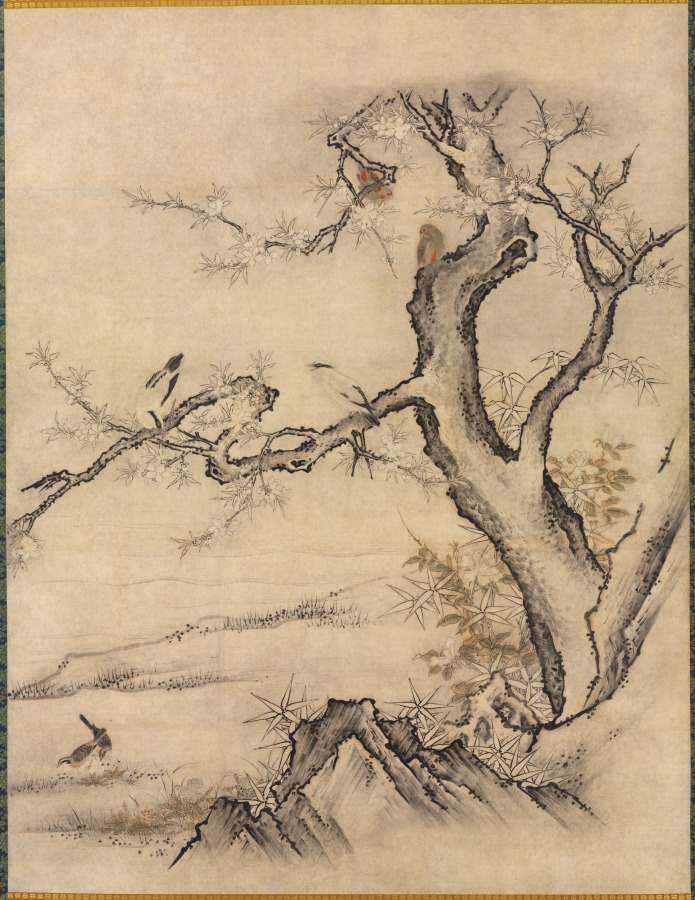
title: Flowers and Birds in a Spring Landscape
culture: Japan, Muromachi period (1392–1573)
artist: attributed to Kano Motonobu (Japanese, c. 1476–1559)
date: 1500s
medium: Sliding door panels mounted as hanging scrolls; ink and color on paper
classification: Painting